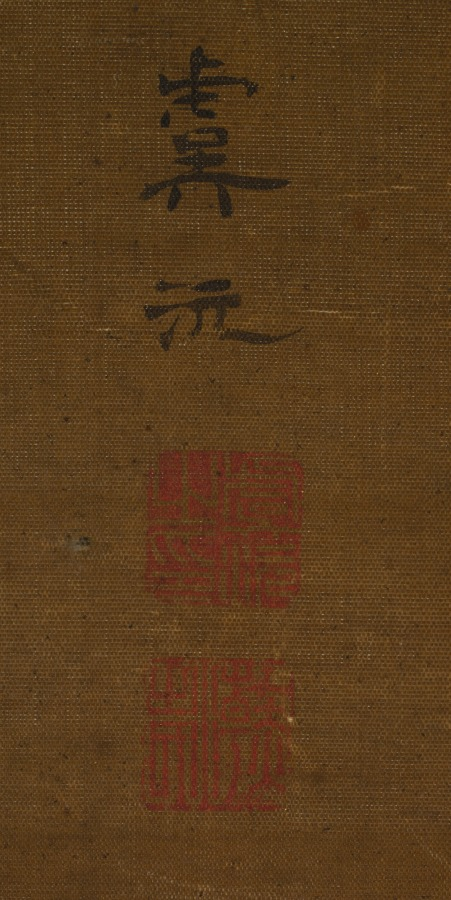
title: Two Horses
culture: China, Qing dynasty (1644-1911)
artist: attributed to Yu Yuan (Chinese, active 1700s)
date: 1644–1911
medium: Hanging scroll; ink and color on silk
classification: Painting